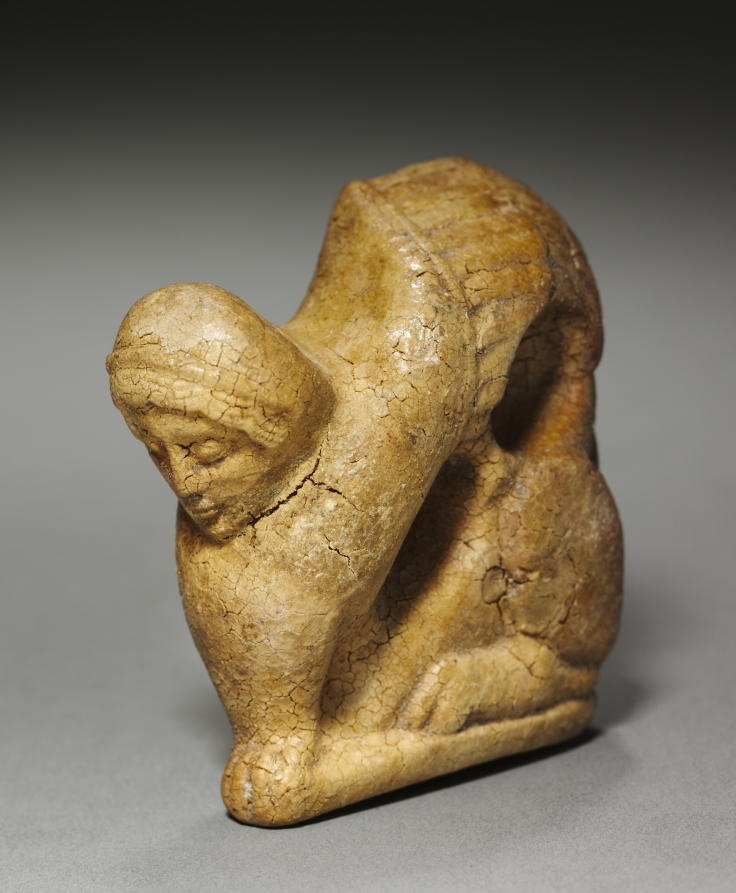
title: Sphinx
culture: Greek/South Italian, Taranto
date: c. 500 BCE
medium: amber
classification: Sculpture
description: Amber, a form of fossilized tree resin, was much prized in the ancient Mediterranean world, perhaps due to its mysterious luminosity, fragrance, and magnetism. It was often carved into figures or heads of humans, animals, or mythical creatures. Small perforations on this sphinx suggest that it may once have been mounted, perhaps for use as a pendant. Although now opaque and crackled due to age, in antiquity the surface probably exhibited some degree of translucence, a valued attribute for amulets and ornaments.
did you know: A sphinx combines the body of a winged lion with the head of a woman.